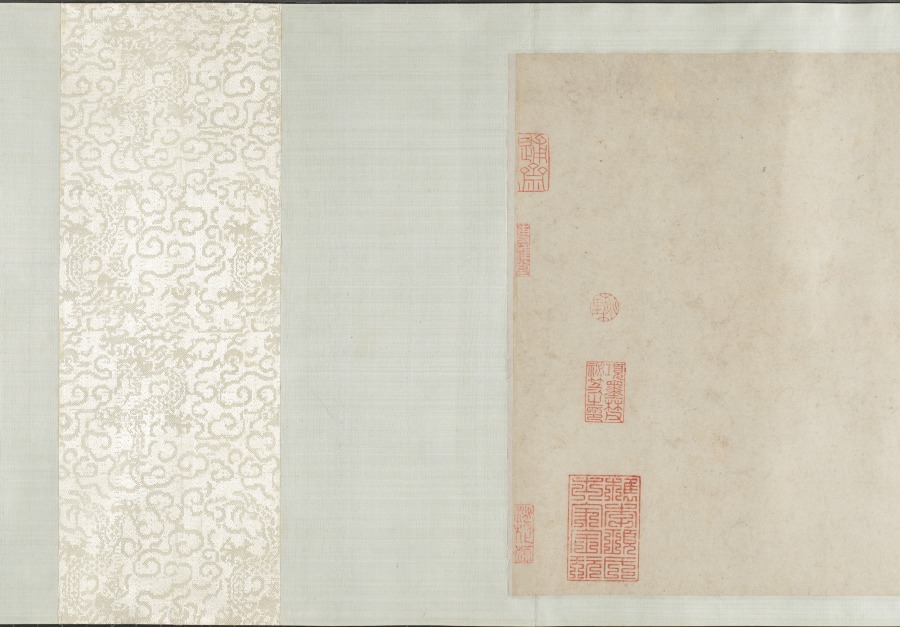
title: Garden for Solitary Enjoyment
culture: China, Ming dynasty (1368–1644)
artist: Qiu Ying (Chinese, 1494–1552)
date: 1515–52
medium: Handscroll; ink and light color on silk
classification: Painting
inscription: Accompanying text of an essay together with seven poems of Sima Guang (1019–1086) and one poem of Su Shi (1037–1101) written by Wen Zhengming (1470–1559) in 1558.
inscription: 2 colophons and 82 seals: 4 seals of Wen Zhengming 文徵明 (1470–1559); 59 seals of Xiang Yuanbian 項元汴 (1525–1590); 1 colophon, dated 1644, and 7 seals of Xiang Yukui 項禹揆 (c. late 1500s–1659); 1 colophon, dated 1880, and 2 seals of Weng Tonghe 翁同龢 (1830–1904); 2 seals of Ch'eng Chen-i (19th c.); 1 seal of Han Ch'ung (19th c.); 4 seals of Wan-go H. C. Weng 翁萬戈 (1918–2020); 3 seals unidentified.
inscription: Colophon by Xiang Yukui 項禹揆 (c. late 1500s–1659): The painting of The Garden for Self-enjoyment on the right by Shih-chou, Mr. Qiu [Qiu Ying] is in the style of Li Lung-mien. Its mood is peaceful, as if meeting the ancient gentlemen face to face among the brushes and silk; it lifts one above the sordid bustle of life. Formerly, my late father handed me this scroll which had only the painting without the written essay. I considered asking a good calligrapher to write the essay to add to it but was afraid that the quality of the writing would not match the painting. Several years later, I saw at a friend's house this essay and poems (of Ssu-ma Kuang] written by Hengshan [Wen Zhengming], once owned by my grandfather; so I spared no expense to obtain it. I rejoiced at this and said: "The divine swords are finally united. How things are pre-destined!" Now my friend Chang Kung-chao's technique for mounting [painting and calligraphy] is excellent. Therefore by daring to take them out and join them together, I can preserve this beautiful story of singular reunion. Xiang Yukui recorded at Hai-yeh-t'ang [hall] two days before New Year's Eve in the jiasheng year of the Chongzhen era [1644]. trans. LYSL/HK/WKH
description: Garden of Solitary Enjoyment refers to a site built in 1073 by the statesman Sima Guang (1019–1086) after he had retired to Luoyang, Henan province. Every spring, visitors would flock to his garden. Each of its seven structures references a historic figure. Sima wrote: I channel streams [like Du Mu], to water flowers [like Bai Juyi], or trim bamboo [like Wang Huizhi]. . . . I know of no joy between heaven and earth that could take its place. Qiu Ying’s painting, created after an 11th-century version of the same theme, must have appealed to garden owners of the Ming dynasty, since it became the template for numerous Suzhou workshop copies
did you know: Sima Guang completed his monumental survey of Chinese history, Zizhi tongjian, in the garden depicted in this painting.